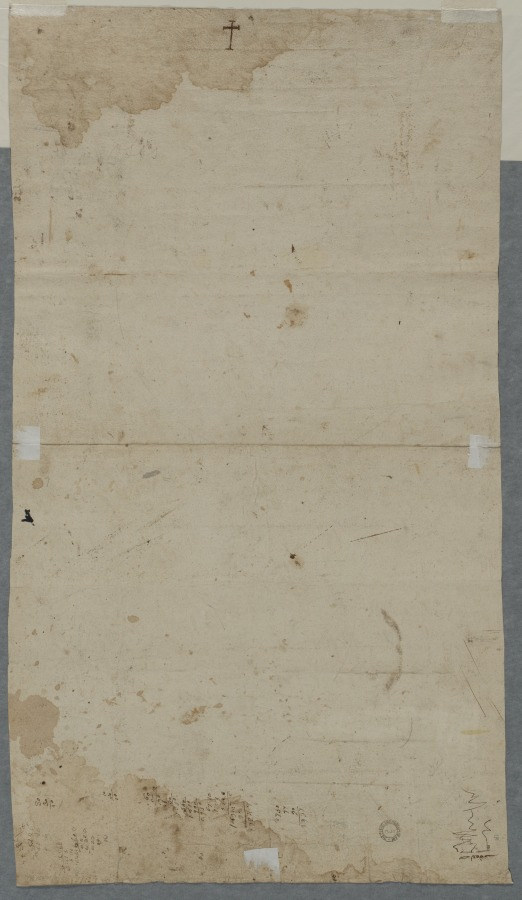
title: Design for a Monstrance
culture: Italy, Turin, 17th century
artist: Anonymous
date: 1600s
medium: pen and brown ink (ruled in places) and brush and brown wash, with graphite, traces of brush and gray and pink wash, and stylus; framing lines in graphite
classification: Drawing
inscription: upper left, in brown ink: N° 4 ; upper left, in brown ink: 16 / [illegible]0 [underlined] / 00 / 32 [underlined] / 3[illegible]6 [all upside down] ; upper right, in graphite: Principio ; lower left, in brown ink: [illegible] [crossed out in brown ink] ; lower left, in brown ink: N [underlined twice] ; lower left, in graphite: 755 [underlined] / 430 ; lower right, in graphite: Fine ; lower right, in graphite: 755 / 430 / 1/6 ; VERSO, upper center, in brown ink: t [shape of a cross] ; upper left, in graphite: [illegible] ; upper left, in graphite: osss ; across bottom, in brown ink: [long series of numbers, sideways] ; lower center, in brown ink: [illegible, masked] ; lower right, in graphite: [series of numbers, upside down] ; lower right, in black ink: 5 [sideways, circled]